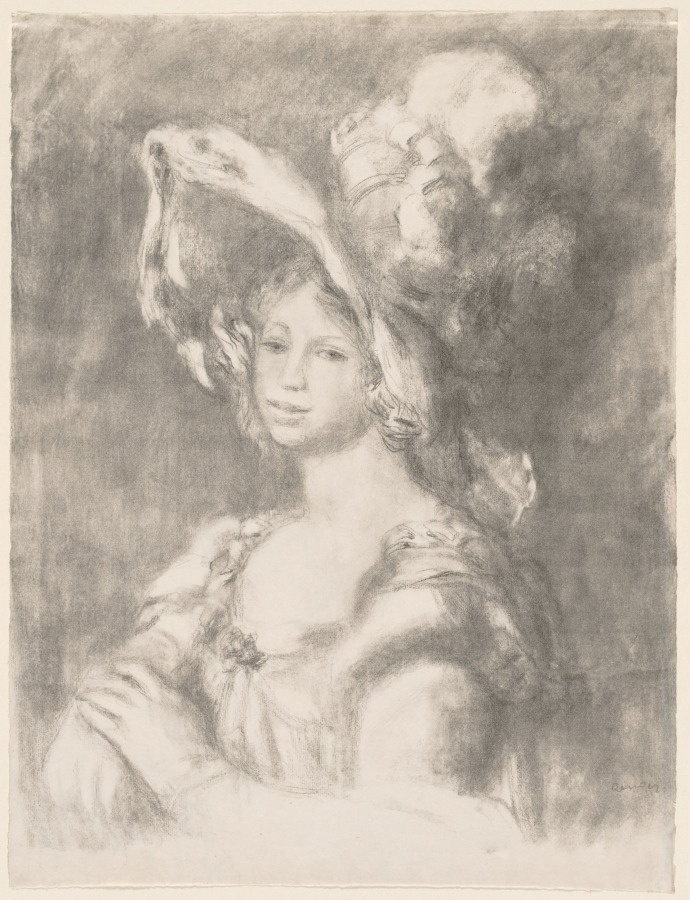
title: Bust of a Young Girl (Mlle. Dieterle)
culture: France, 19th century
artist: Pierre-Auguste Renoir (French, 1841–1919)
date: 1899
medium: lithograph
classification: Print